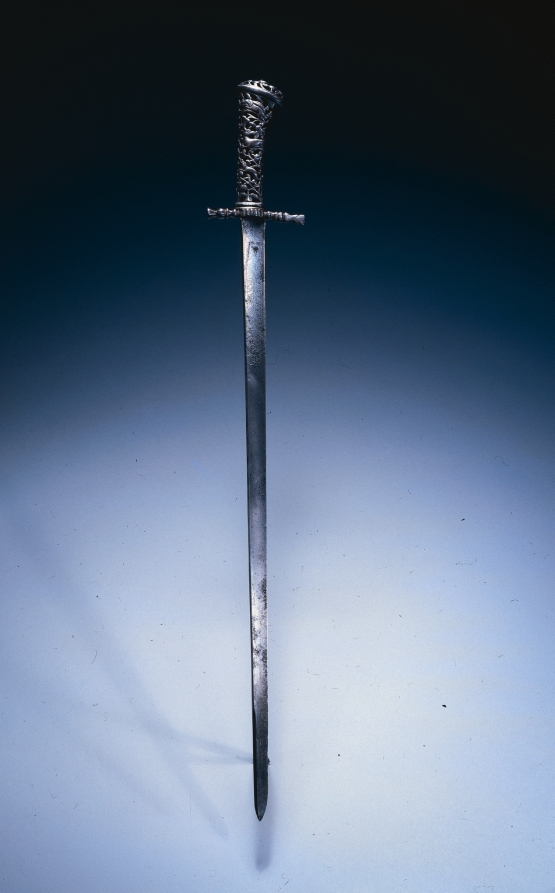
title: Hunting Sword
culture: Netherlands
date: c. 1760–70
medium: steel; pierced and chiseled cast-iron hilt ; blade engraved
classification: Arms and Armor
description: No gentleman's hunting costume was complete without a hunting sword. These special sidearms, designed primarily as defense against dangerous game in the field, were also used to dispatch game at the end of a chase. It was a point of honor among aristocratic hunters to carve and section the game in the field, a further function for which these swords were well suited. They were often made as a set, or garniture, and included smaller knives, forks, and other implements for carving the carcass.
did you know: Besides being viewed as a recreation for European nobility and an ancient and hereditary right, hunting was recognized as a necessary and pragmatic skill which supplied an additional source of food and dispatched animals which were considered a menace.